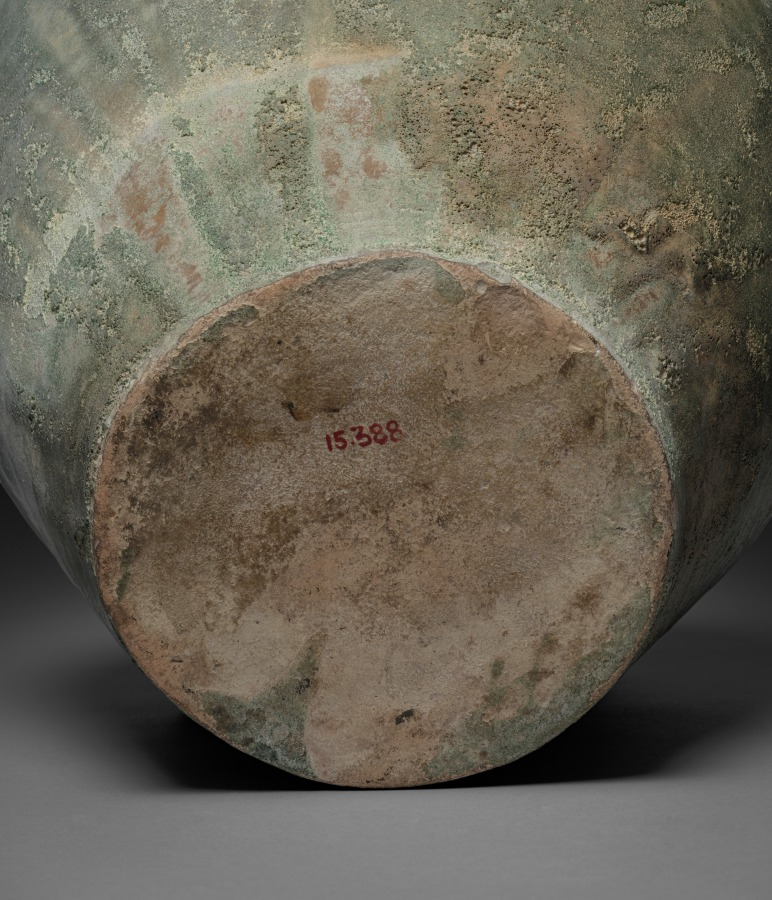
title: Jar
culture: China, Six Dynasties period (265-589) or Sui dynasty (581-618)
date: 500s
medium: glazed earthenware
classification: Ceramic